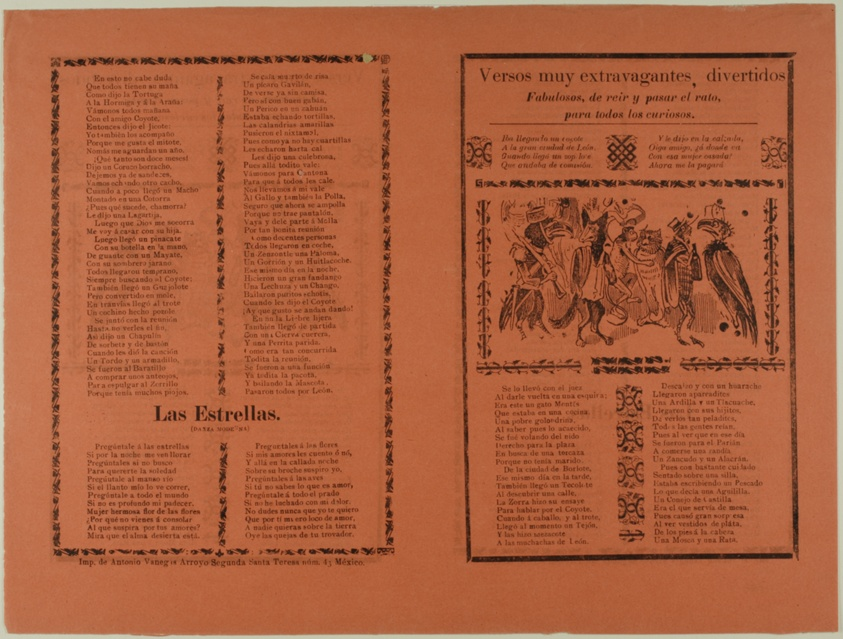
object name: Print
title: Versos muy extravagantes (Very Extravagant Verses)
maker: José Guadalupe Posada (Mexican, 1852-1913)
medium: Relief print on paper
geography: Mexico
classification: relief etching; print; prints and drawing